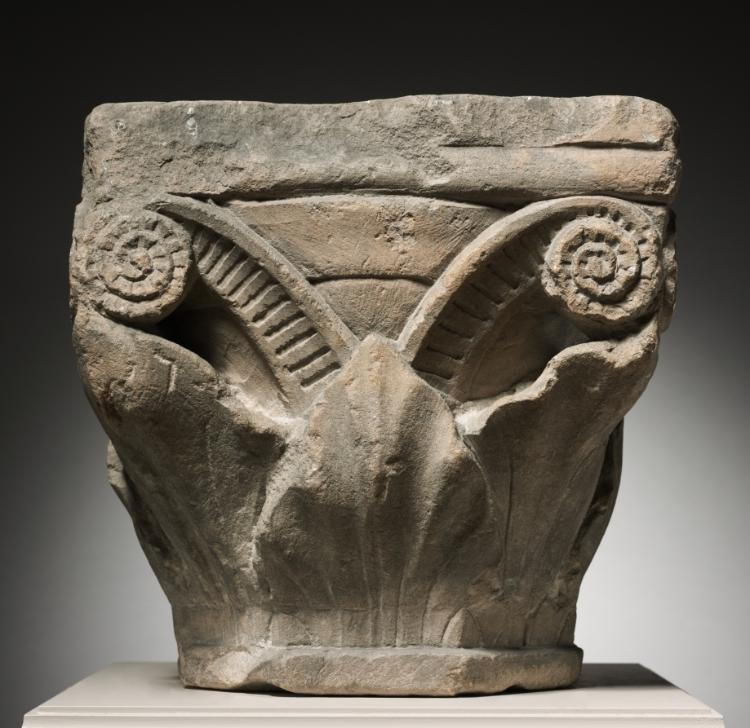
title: Capital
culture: Italy, Migration period, 8th-9th Century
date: 700s-800s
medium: marble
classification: Sculpture